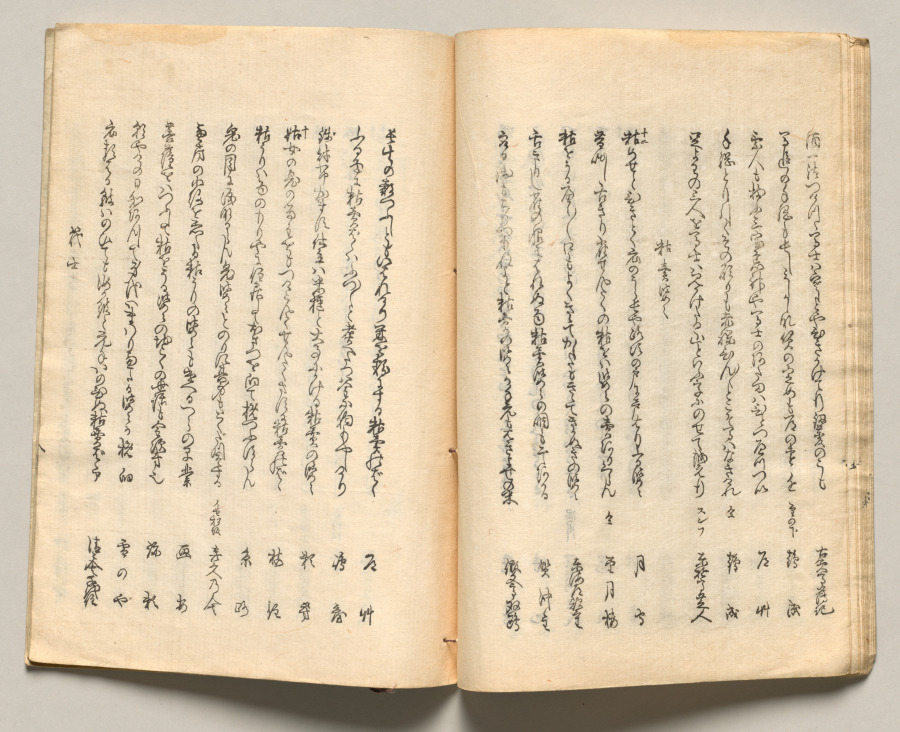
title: Spread Fifteen from Volume Five of People of Japan in Light Verse (Kyōka)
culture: Japan, Edo period (1615–1868)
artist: Utagawa Hiroshige (Japanese, 1797–1858)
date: 1857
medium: Woodblock-printed book; ink and color on paper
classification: Bound Volume